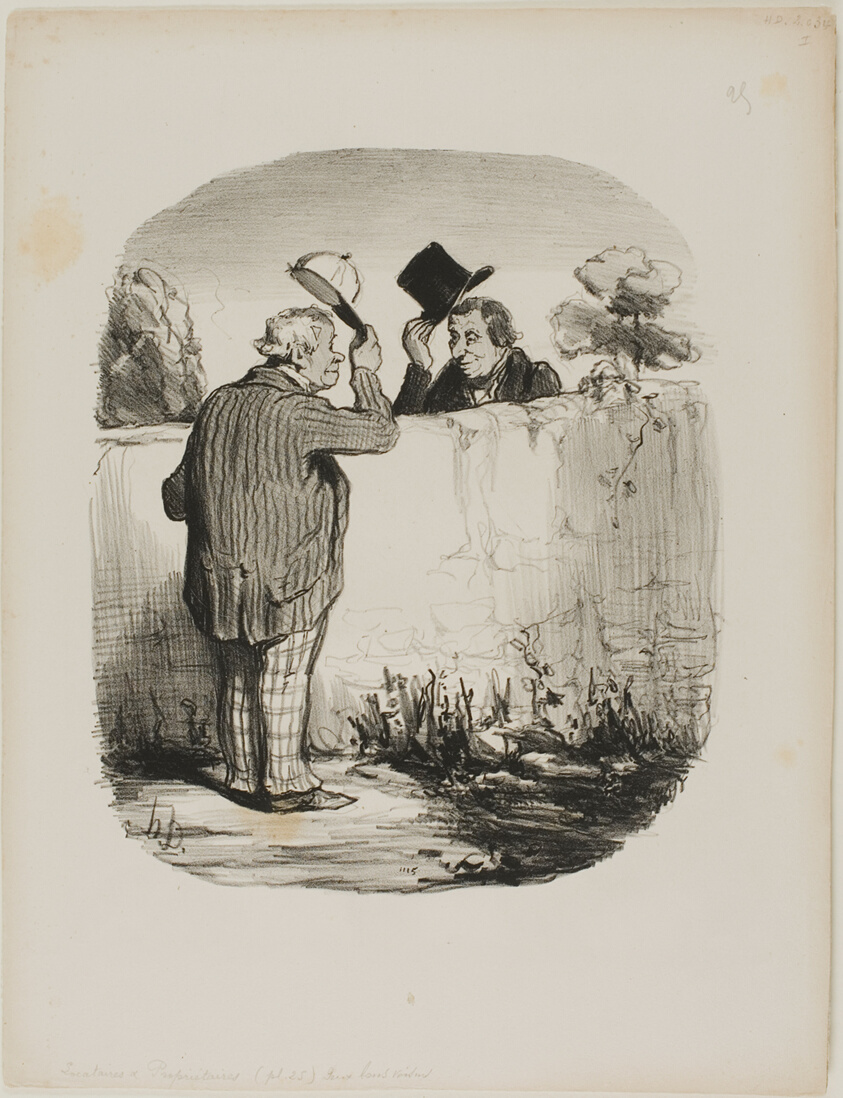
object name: Print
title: Two Good Neighbors, plate 25 from Locataires Et Propriétaires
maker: Honoré Victorin Daumier; French, 1808-1879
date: 1847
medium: Lithograph in black on ivory wove paper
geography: France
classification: lithograph; print; prints and drawing